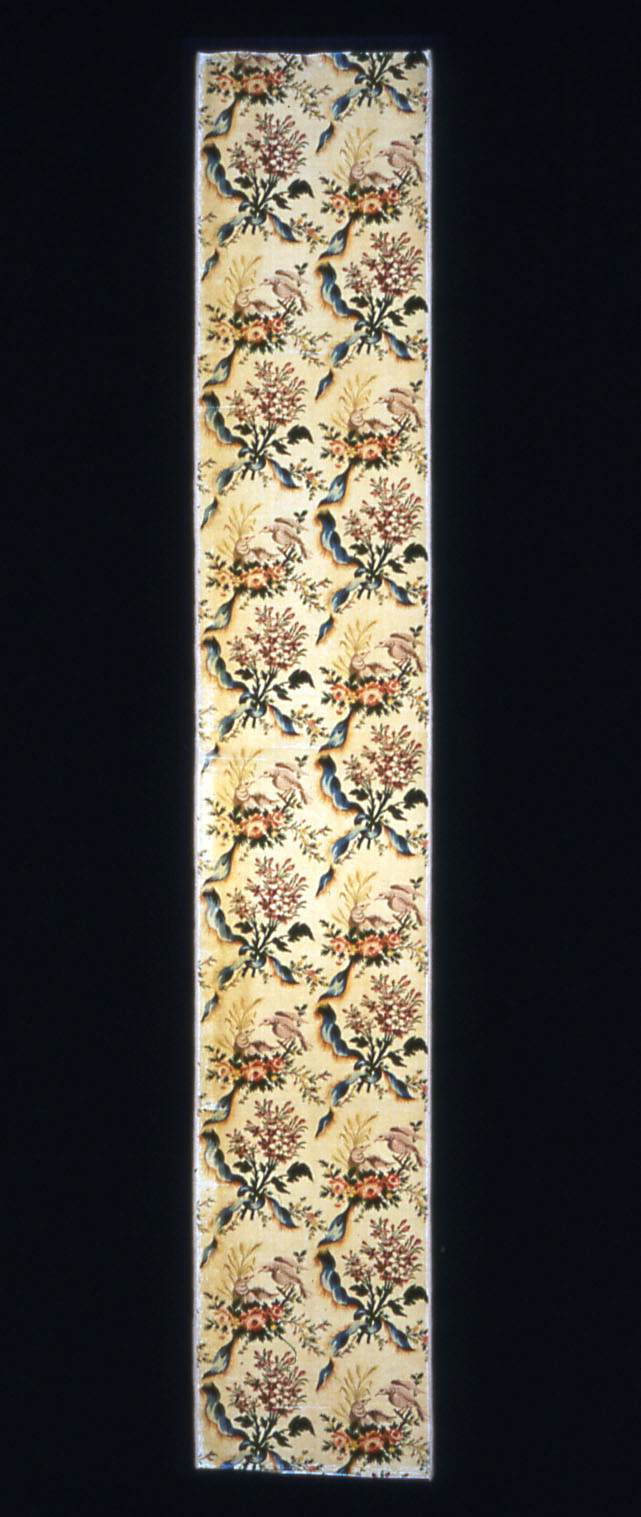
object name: Textile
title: Panel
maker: Designed by Claude Camille Pierre Etienne Pernon (French, 1753–1808); France, Lyon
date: 1788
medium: Silk, twill weave with pile warp printed cut, solid velvet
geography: Lyon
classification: textile; weaving - velvet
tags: flowers, swags